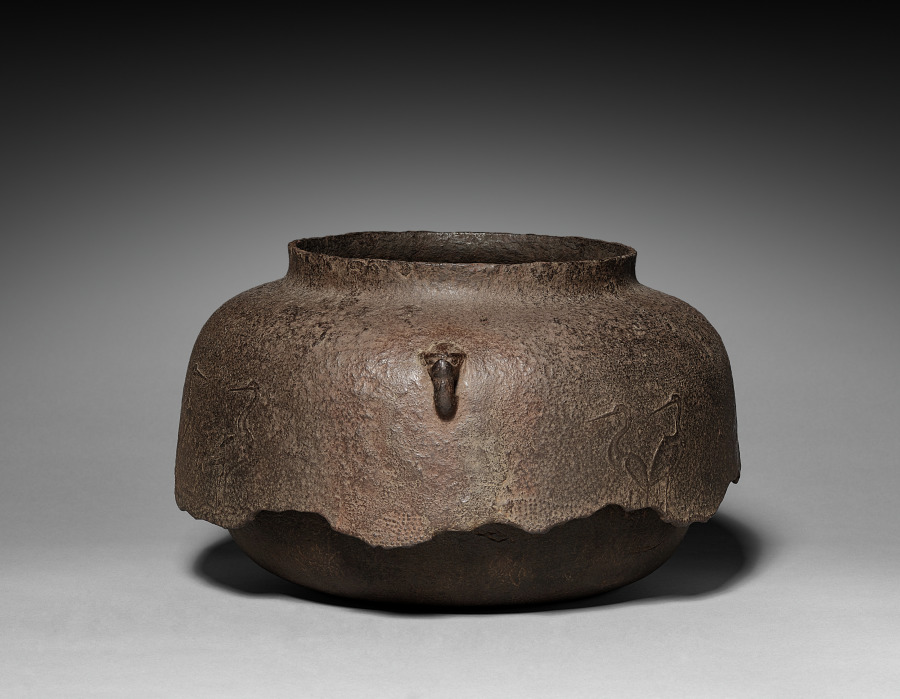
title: Kettle with Crane Design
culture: Japan, Muromachi period (1392–1573)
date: 1392–1573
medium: iron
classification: Metalwork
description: Water supplied from a jar such as the fine Shino-ware vessel (CMA 1972.9.a-b) was transferred to an iron kettle for boiling as part of the tea ceremony. Former CMA director Sherman Lee described the jagged, broken skirt of this kettle as "attractively damaged," complementing the unobtrusive wispy designs on its rough metal surface. The character of this kettle—worn, coarse, the "perfection" of symmetry destroyed—was cherished by tea masters for its powerful humility.